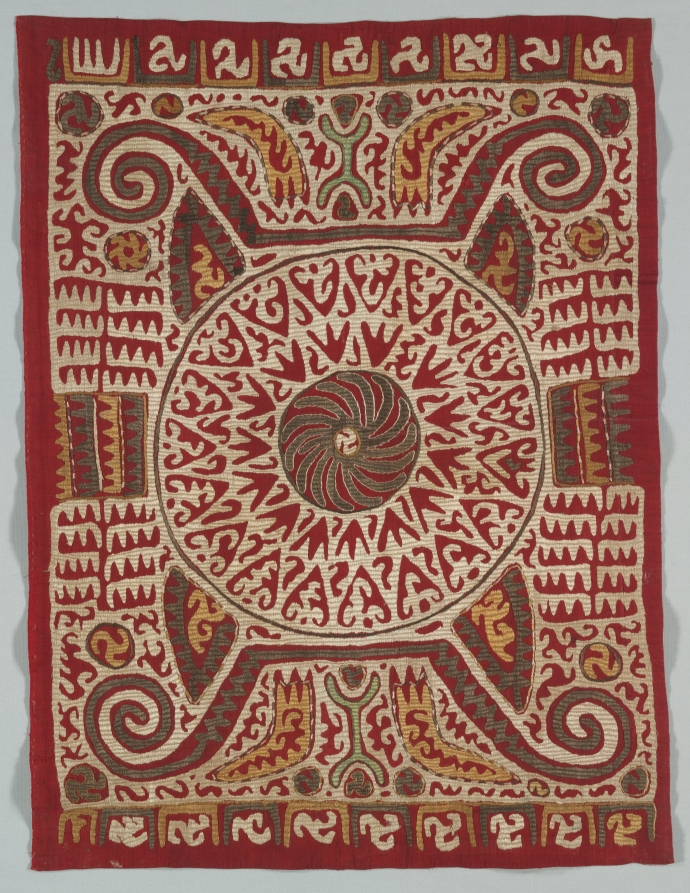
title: Cushion Cover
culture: Dagestan, 18th century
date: 1700s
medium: embroidery, silk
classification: Embroidery